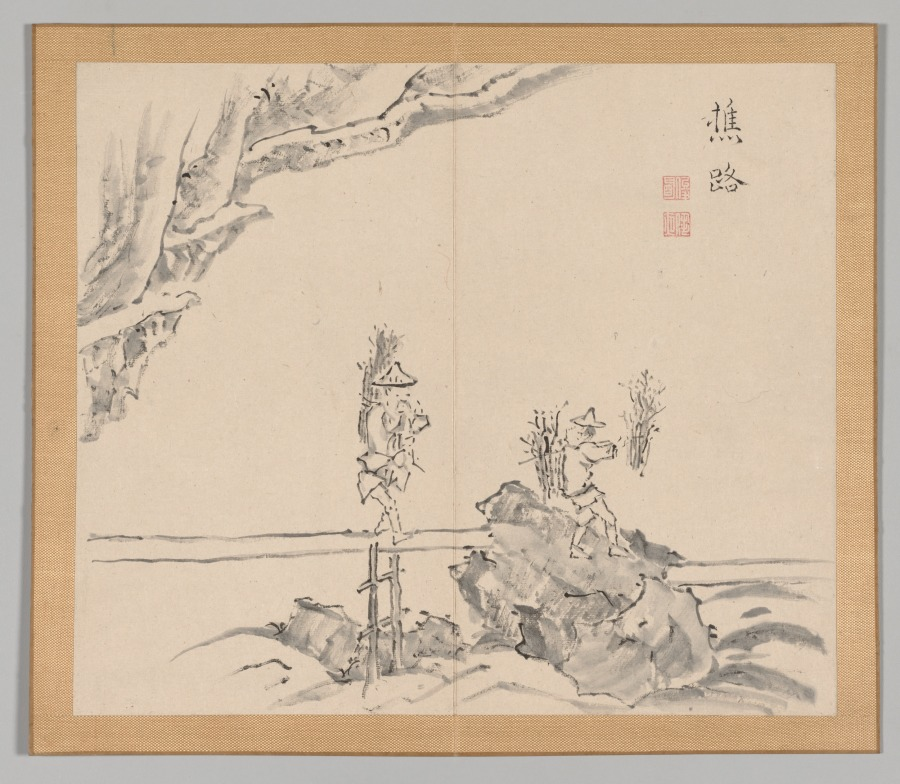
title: Reverberations of Taiga, Volume 1 (leaf 32)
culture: Japan, Edo period (1615–1868)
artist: Aoki Shukuya (Japanese, d. 1802)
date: mid- to late 1700s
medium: double-leaf from a pair of albums; ink and light color on paper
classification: Portfolio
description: Traditionally, young painters in Japan began their studies with an established master-painter. The master's compositions invariably became models that the apprentice copied to learn various ink and brush techniques. Shukuya was a pupil of the famous Kyoto artist Ikeno Taiga, whose style is reflected in these sketches of rocks, trees, and mountains.